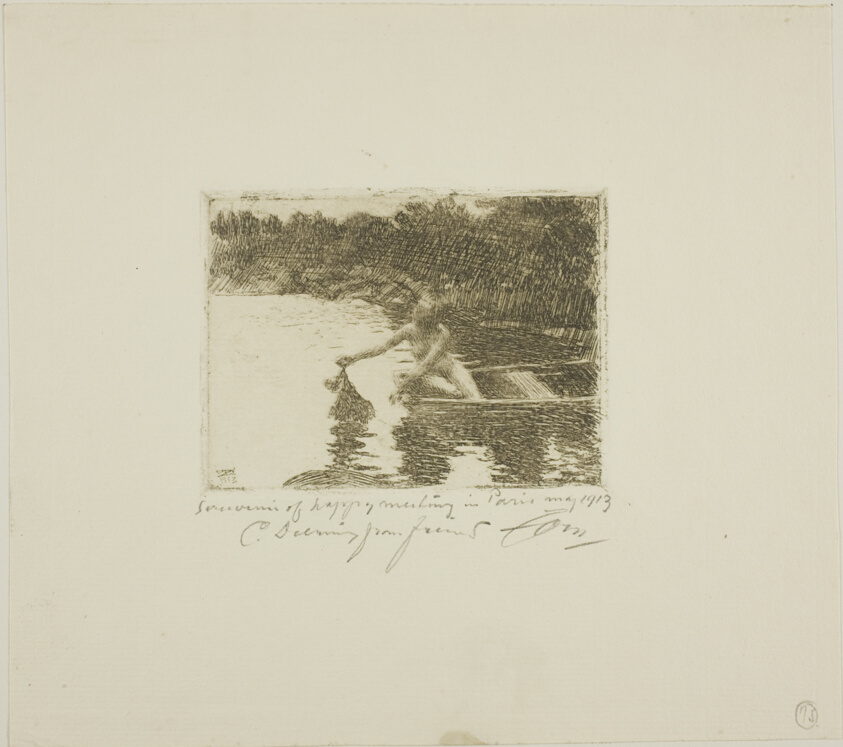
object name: Print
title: Eka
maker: Anders Zorn (Swedish, 1860-1920)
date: 1913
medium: Etching on ivory laid paper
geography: Sweden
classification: etching; print; prints and drawing